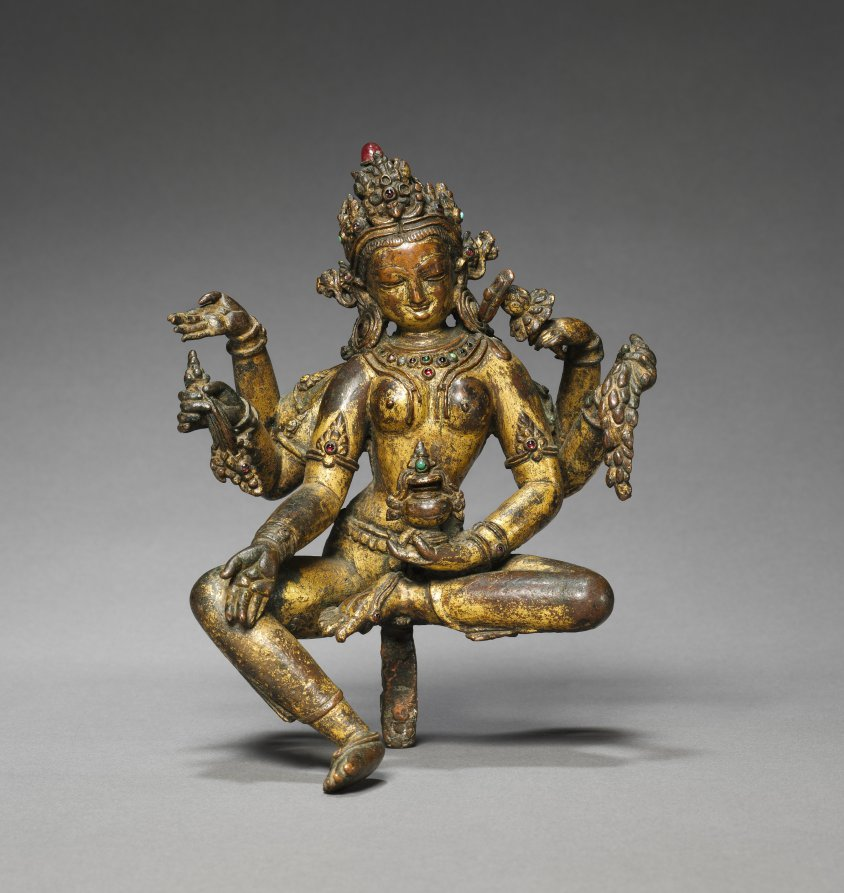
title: Vasudhara, Goddess of Abundance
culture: Nepal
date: 1300s–1400s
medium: gilt bronze and semiprecious stones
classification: Sculpture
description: In Nepal this female counterpart of the god of wealth is one of the most popular divinities. This image was set up in either a domestic shrine or a Buddhist monastery, where devotees would pray to her for wealth, prosperity, and children. In each of her six arms she holds objects pertaining to life and abundance: jewels, an overflowing pot, and a sheaf of wheat. A Buddhist philosophical text rests on top of the lotus flower she holds in her topmost left hand, suggesting that wealth and prosperity can derive from the acquisition of true knowledge.